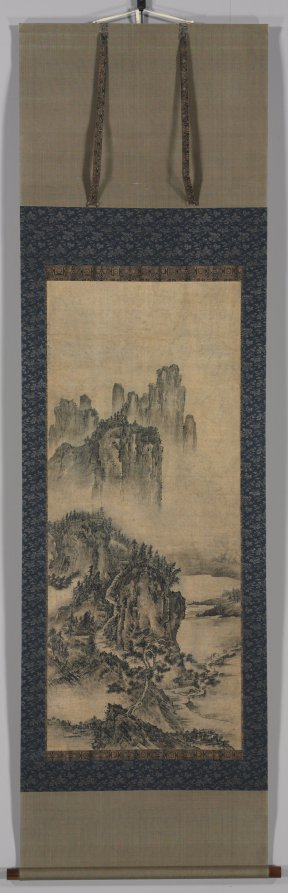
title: Landscape with a Distant Temple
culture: Japan, Edo period (1615–1868)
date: 1600s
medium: hanging scroll; ink on paper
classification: Painting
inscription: apocryphal inscription dated 1490 on the upper left edge of the painting.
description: A traveler has presumably descended from the distant temple compound that consists of several buildings linked together by a winding trail lined with steps. The highest point in the compound is occupied by the most sacred structure in Buddhist temple architecture: a mulitroofed pagoda. This rugged landscape, with its towering craggy peaks, pine forests, and river, typifies the idealized image of religious sanctuary in East Asian medieval ink painting.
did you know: This painter emulated the style of Sesshū Tōyō (1420–1506) a Japanese artist who traveled to China to study painting.